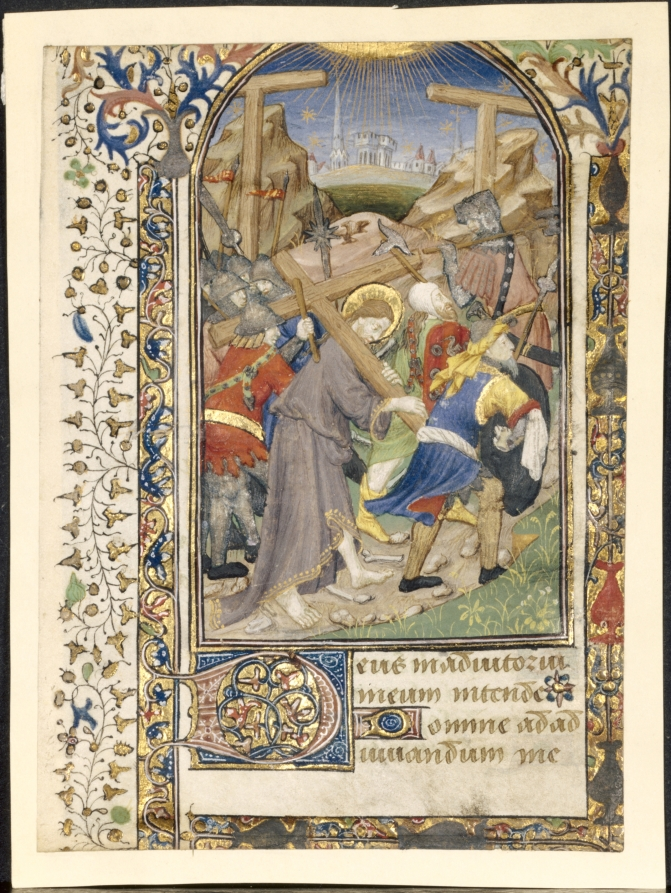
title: Leaf Excised from the Tarleton Hours: Christ Carrying the Cross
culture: Northern France, Normandy, Rouen?, 15th century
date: c. 1430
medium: ink, tempera, silver, and gold on vellum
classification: Manuscript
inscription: Deus in adiutorium meum intende. Domine ad adiuvandum me…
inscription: Festina. Gloria Patri, et Filio: et SSpiritui Sancto, Sicut erat in Principio. Memento salutis auctor. Quod nostri quondam corporis, Ex illibata virgine Nascendo, formam sumpseris. Ad Dominum cum tribularet, clamavi: et exaudivit me. Domine libera animam meam a labiis iniquis: et a lingua dolosa. Quid detur tibi, aut quid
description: Although the Hours of the Virgin are traditionally illustrated with scenes from the early life of Christ, sometimes the Passion of Christ, or the events leading up to and immediately after the Crucifixion, are used. This scene of Christ carrying the cross, used for the sixth hour (Sext), is placed between a scene of flagellation, or beating, and the Crucifixion. This book of hours uses the feminine pronoun in prayers, indicating that it had a female owner.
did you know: The images and decorated initials in the book helped users navigate to sections they needed.